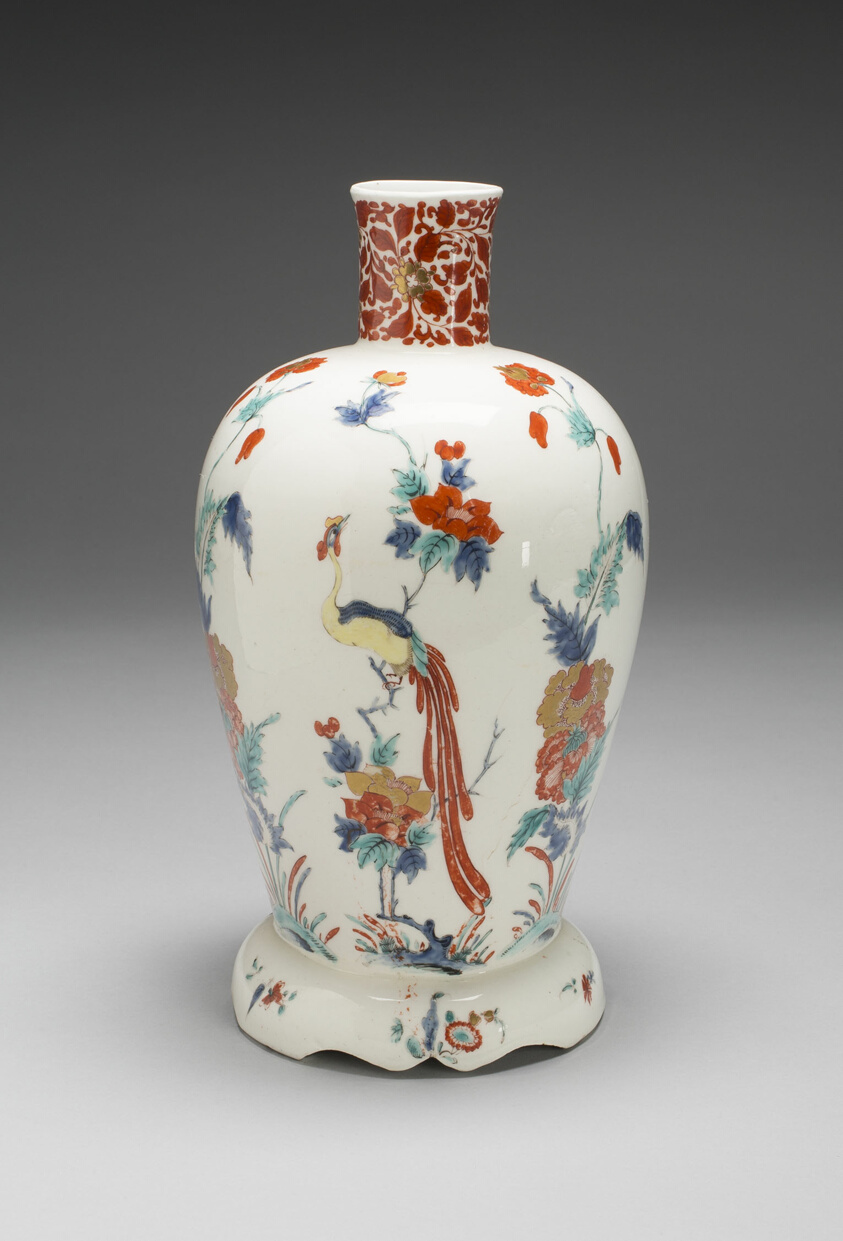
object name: Ceramics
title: Vase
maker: Bow Porcelain Factory (London, England, 1744-1775)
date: c. 1755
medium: Soft-paste porcelain, polychrome enamels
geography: England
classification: vase; porcelain; vessel; european decorative arts; ceramics